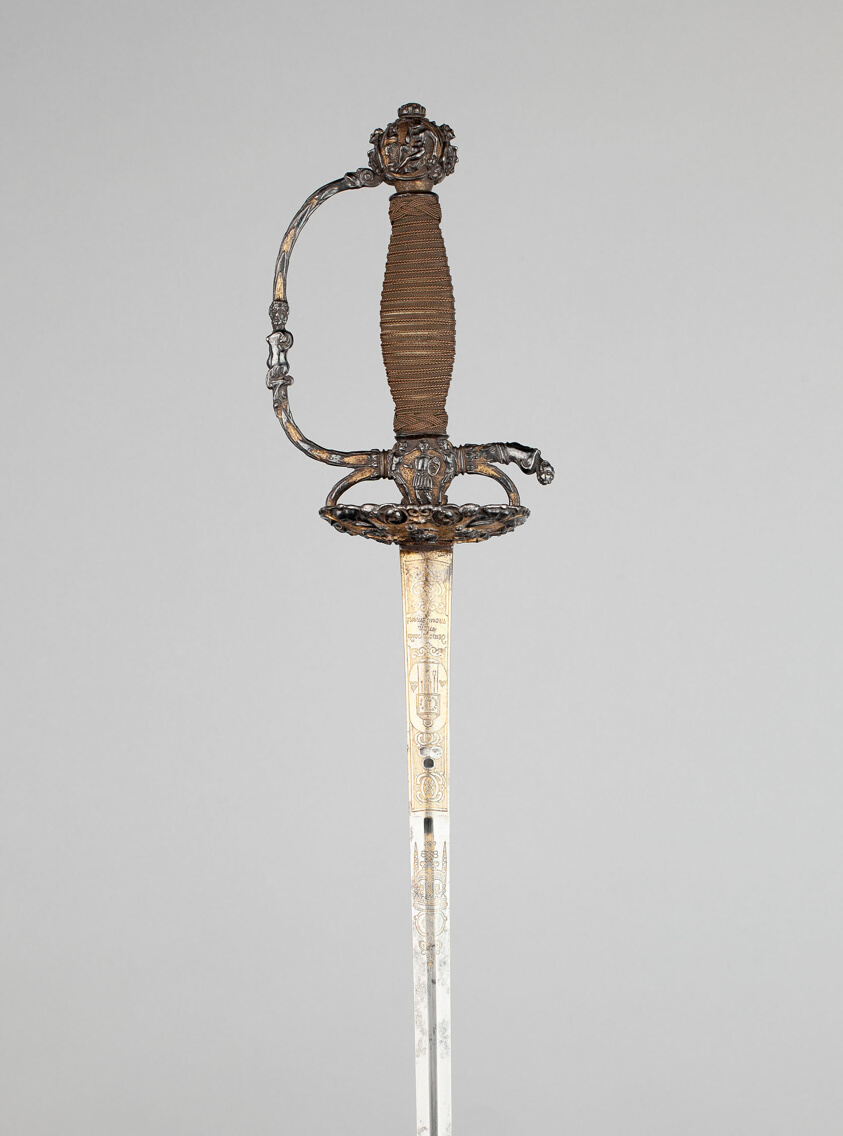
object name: Arms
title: Composite Smallsword and Scabbard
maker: Hilt: Flemish or Dutch; blade: French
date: Hilt: c. 1650/60; blade: 1750/60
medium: Steel, gilding, copper, wood, and leather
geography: Netherlands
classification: edged weapon-sword; arms; arms and armor